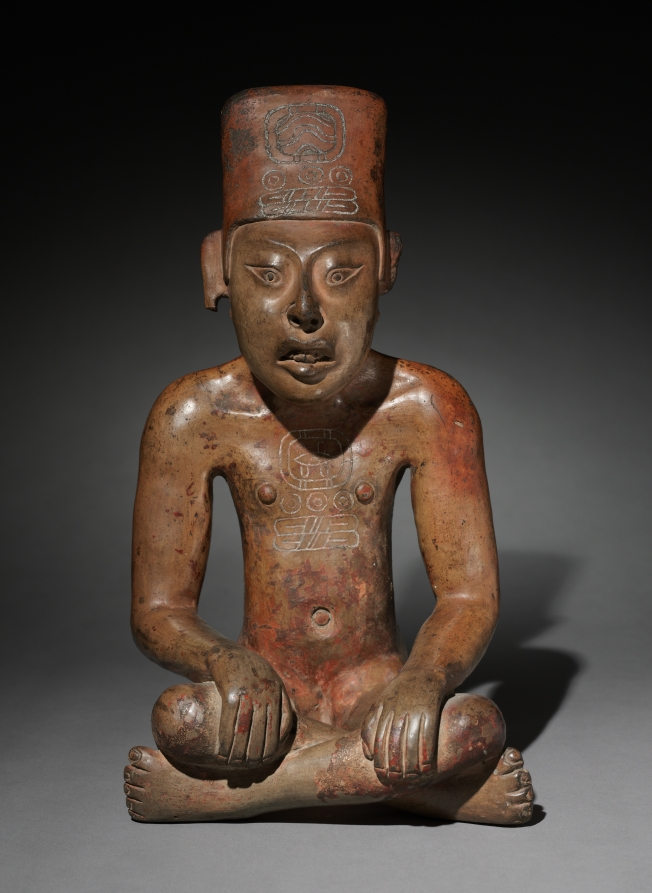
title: Seated Figure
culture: Mexico, Oaxaca, Zapotec style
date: 300 BCE–700 CE (thermoluminescence date, 285 BCE–515 CE)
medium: ceramic, slip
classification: Sculpture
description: The most famous Zapotec tomb ceramics are elaborate figural urns flanked by smaller, simpler companions similar to this one. Like other companions, this example probably belonged to a set of nearly identical figures; two others remain in Mexico. The identity of ceramic tomb figures-whether elite humans, royal ancestors, or deities-is still debated. The Zapotec developed one of Mesoamerica’s earliest writing systems, evidenced by the hieroglyphs on the headdress and chest. These are the names of calendar days, "13 Water" and "13 Flint Knife," respectively. Because people were named after the day on which they were born, one hieroglyph may identify the figure.